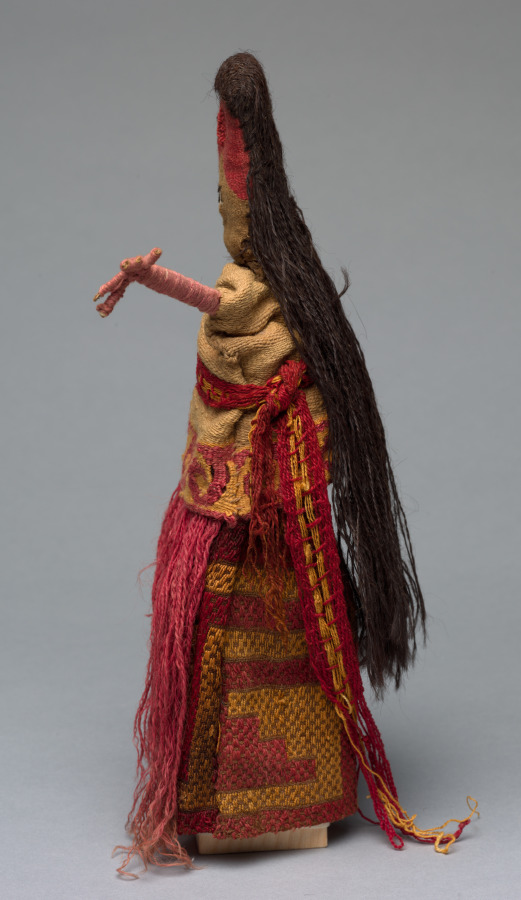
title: Male Figure with Modern Additions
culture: Peru, Central Coast, Chancay people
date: 1100–1500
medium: Original elements include the head and tunic; added elements include the skirt, red fringe, and belt; Cotton, camelid fiber, reeds; Slit tapestry (tunic and face); plain weave with supplementary weft (skirt)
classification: Miscellaneous